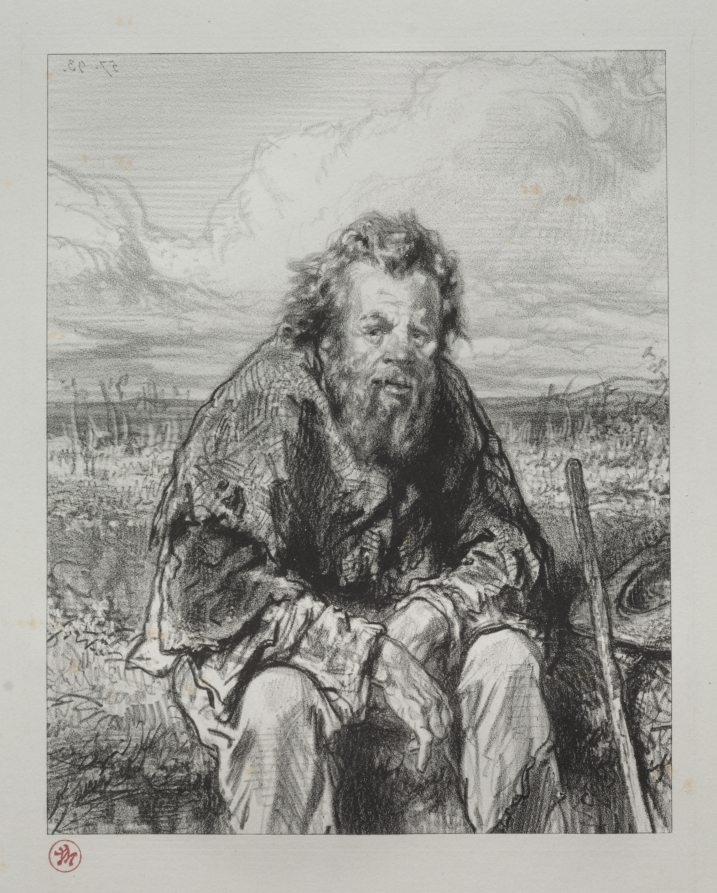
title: Do not Mention Policemen to Him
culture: France, 19th century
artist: Paul Gavarni (French, 1804–1866)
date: c. mid-1800s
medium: lithograph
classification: Print